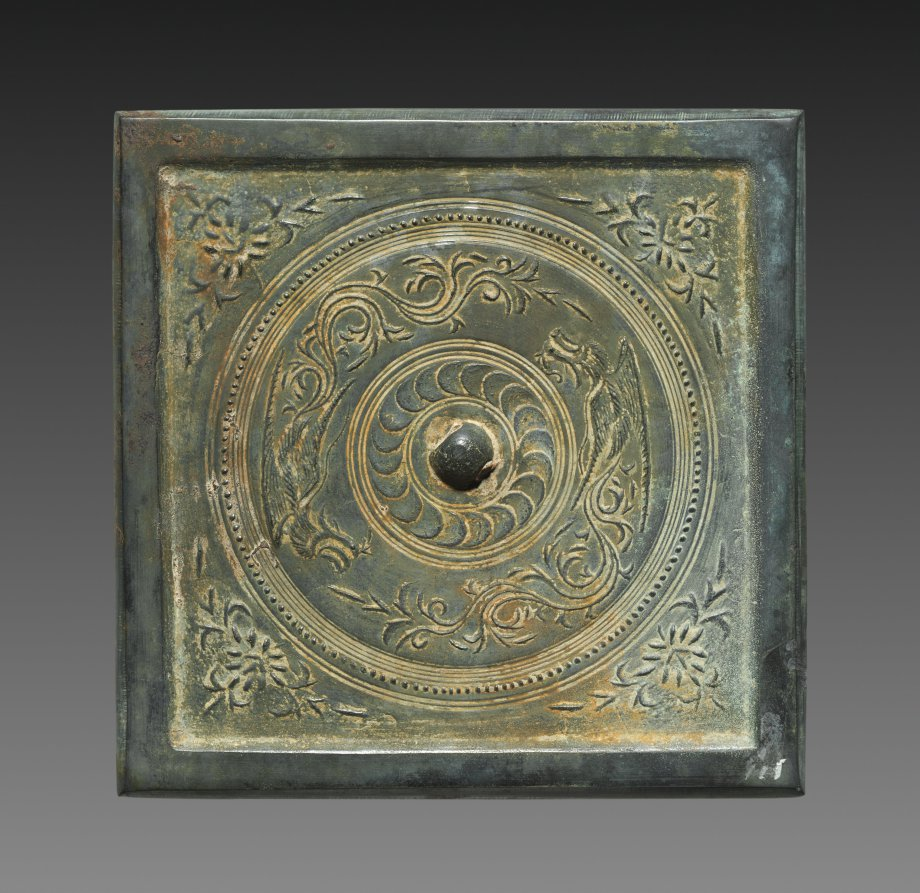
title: Square Mirror with Two Phoenixes and Floral Sprays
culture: China, Northern Song dynasty (960-1127)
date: 960–1127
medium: bronze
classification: Metalwork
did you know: The Chinese phoenix is known as Fenghuang, mythological birds in East Asian mythology that reign over all other birds.